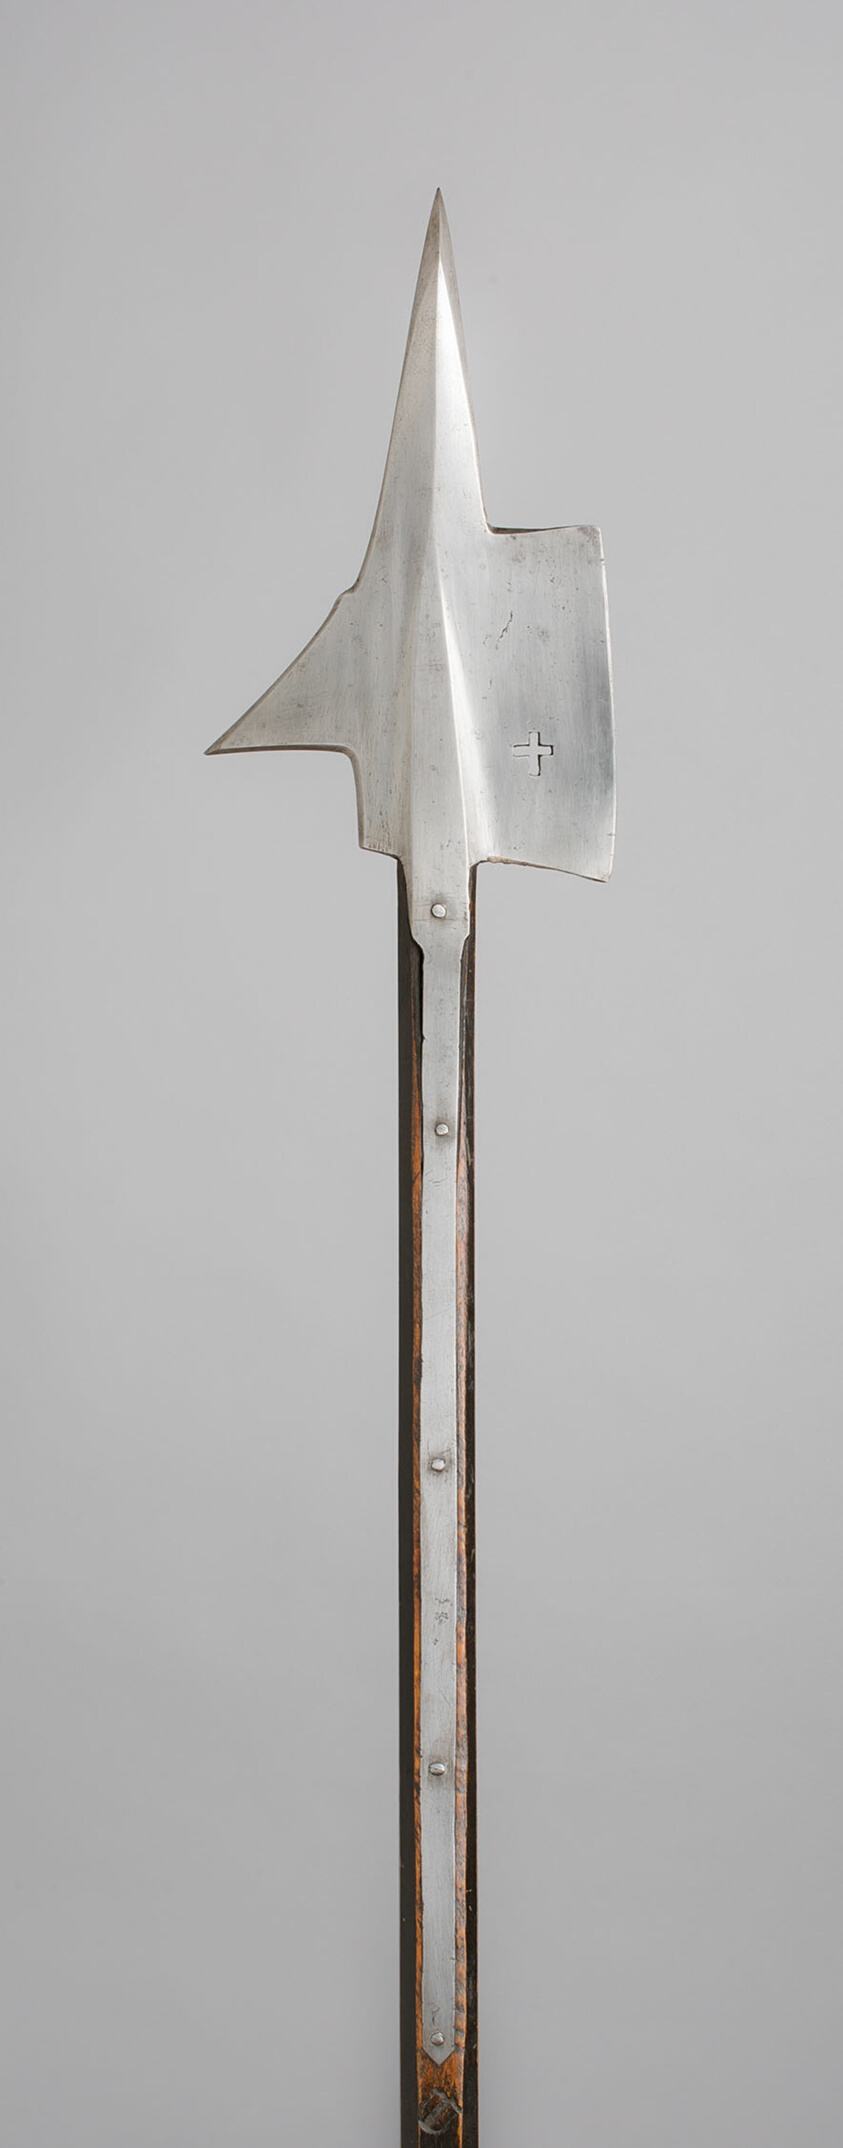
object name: Arms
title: Halberd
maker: Possibly Lamprecht Koller (Swiss, Würenlos, active about 1663-1681)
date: 1663-81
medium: Steel and wood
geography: Switzerland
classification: edged weapon-staff; arms; arms and armor